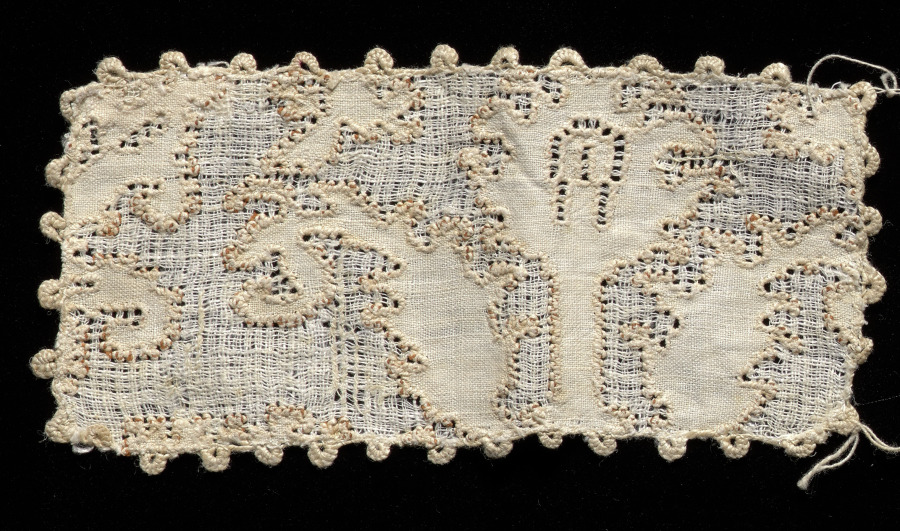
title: Lace Cuff (one of two)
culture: Italy, 1800s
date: 1800s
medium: Linen: needle lace (drawnwork)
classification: Lace